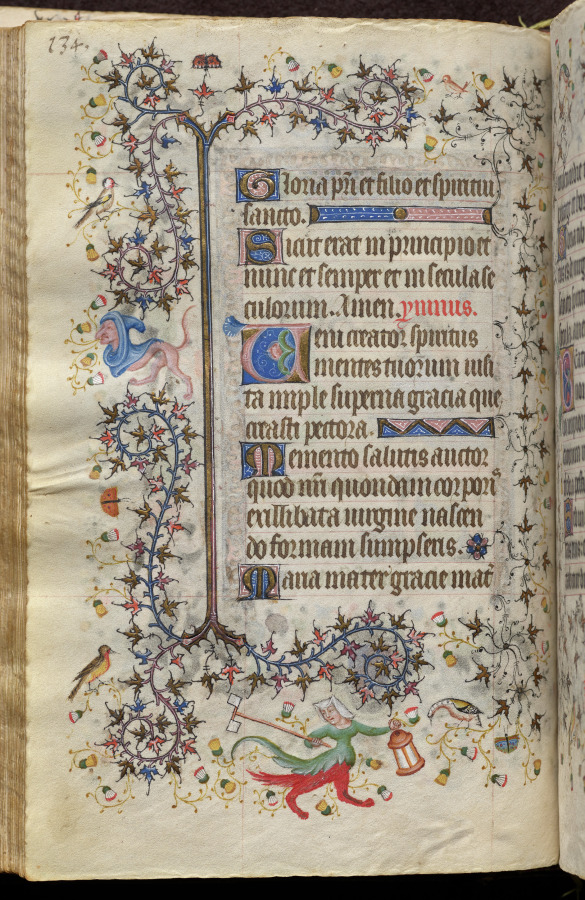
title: Hours of Charles the Noble, King of Navarre (1361-1425): fol. 67v Text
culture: France, Paris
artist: Master of the Brussels Initials and Associates (French)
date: c. 1405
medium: ink, tempera, and gold on vellum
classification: Bound Volume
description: This precious volume was obviously highly prized by its owner, the French-born King of Navarre, who had his coat of arms painted on no less than twenty folios. Rather than directly commissioning this manuscript from a specific workshop, it seems that Charles the Noble acquired his book of hours -- perhaps ready-made for the luxury market -- while on a trip to Paris in 1404-05. A collaborative effort, six painting styles are evidenced within the pages of this codex, those of two Italians, two Frenchmen, and two Netherlanders. The painter who was responsible for the planning and decoration of the book, and who produced seventeen of the large miniatures, was a Bolognese artist known as the Master of the Brussels Initials. His principal assistant, responsible for most of the borders, was a Florentine who signed his name "Zecho" da Firenze on folio 208 verso.